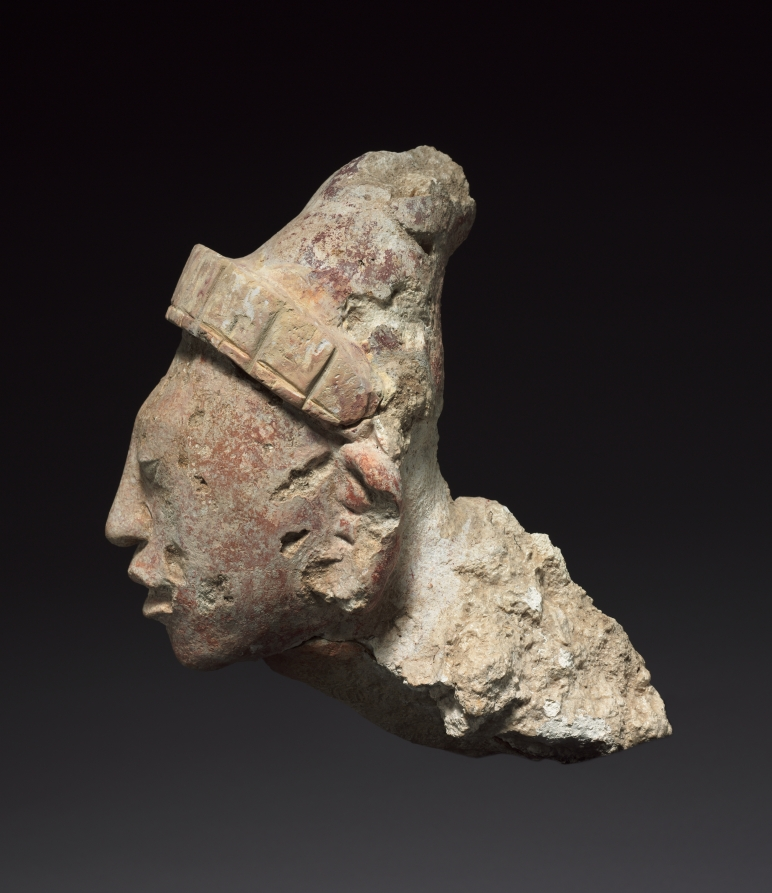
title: Head from a Building's Façade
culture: Mexico, Campeche, Maya style (250-900)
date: 250–900 CE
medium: stucco, paint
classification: Sculpture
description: The Maya often lavishly decorated the exteriors of buildings, transforming them into elaborate sculptural works in their own right. This sensitively modeled head, made from fragile stucco, would have been affixed to the façade of a palace or temple via the tenon (projection) at the back of the head. The rest of the body may have been modeled separately.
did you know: Maya elites practiced cranial modification on infants to achieve the sloped profile seen in this tenoned head.